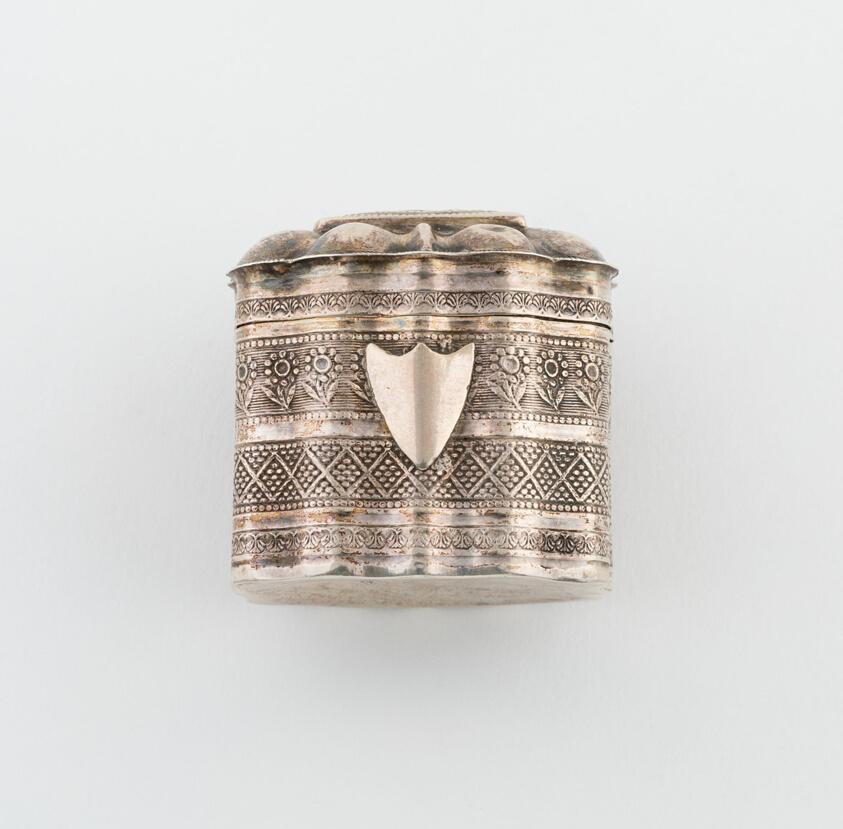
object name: Metalwork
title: Sponge Box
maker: Possibly Adrianus G. Kooiman; Dutch, active c. 1837-c. 1860; Possibly Schoonhoven, Netherlands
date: 1848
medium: Silver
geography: Netherlands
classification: container for personal use; box; european decorative arts; metalwork; silver; decorative object/ornament